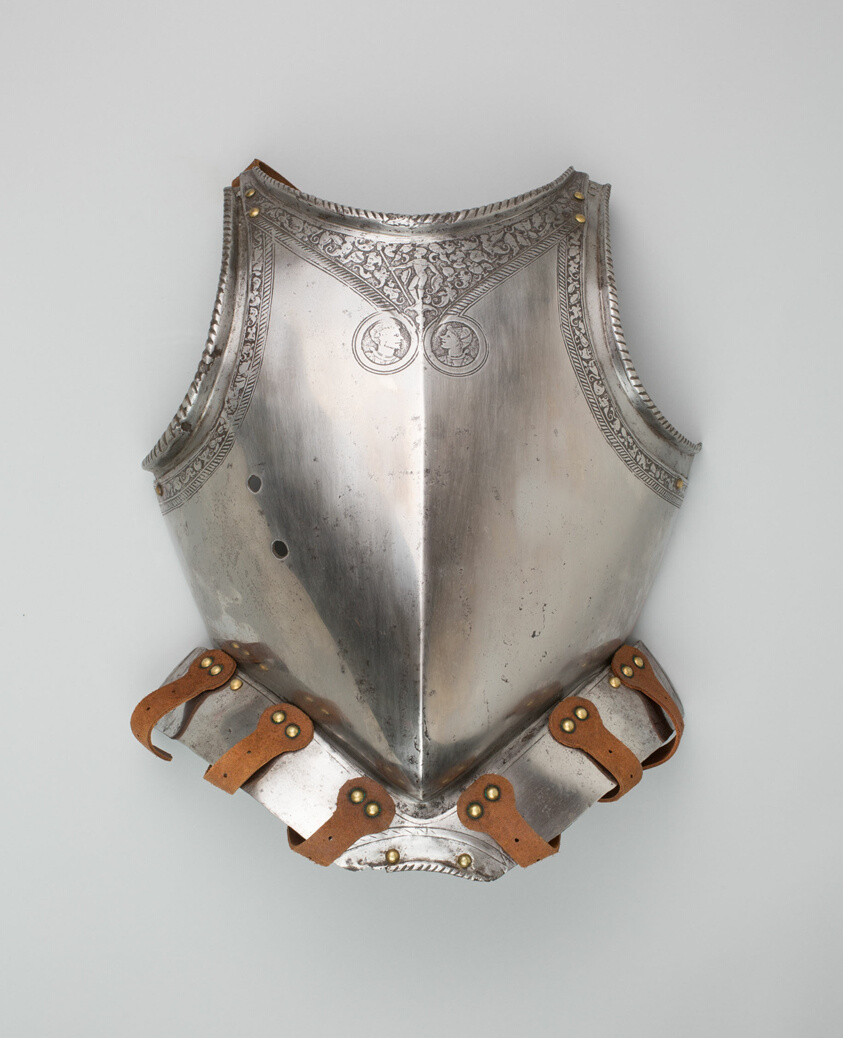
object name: Armor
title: Breastplate with Associated Skirt for Half-Armor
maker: Northern Italian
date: c. 1580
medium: Steel, etched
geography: Northern Italy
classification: suit-element; armor; arms and armor